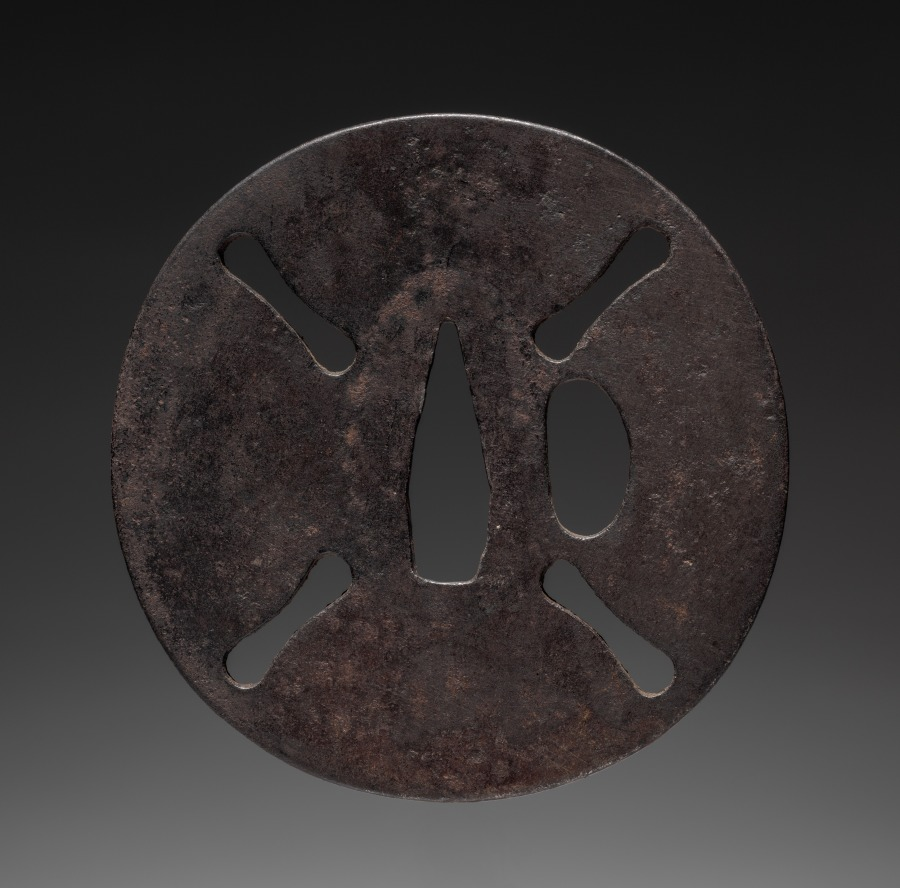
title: Sword Guard (Tsuba)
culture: Japan, possibly Edo period (1615-1868)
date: c. 1615–1868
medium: iron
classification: Arms and Armor